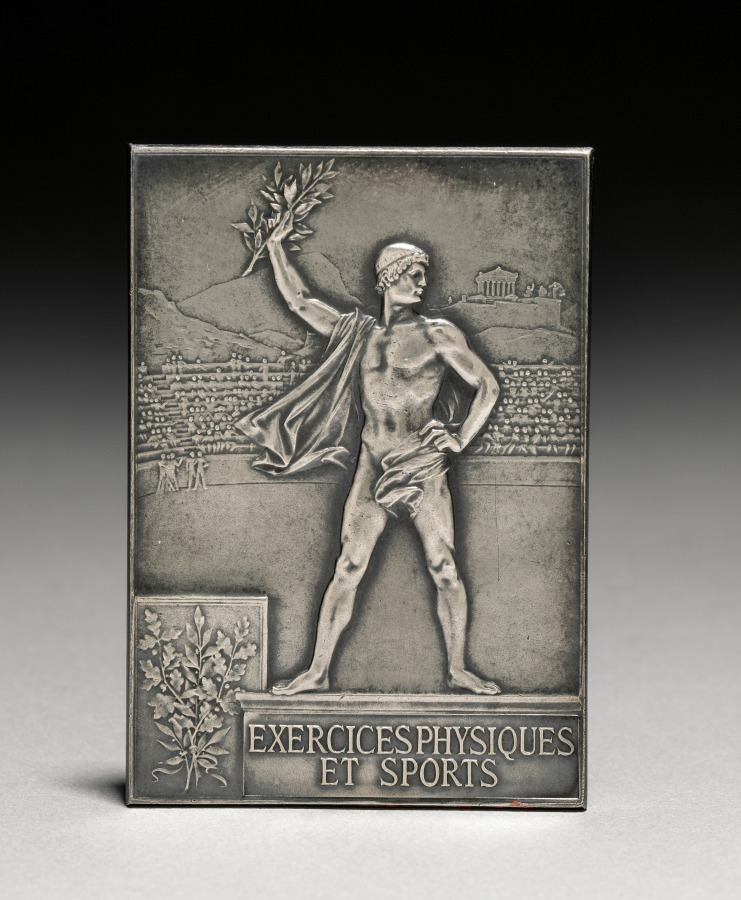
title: Medal of French Republic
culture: France, Paris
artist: F Vernon (French)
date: 1900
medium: silver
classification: Silver